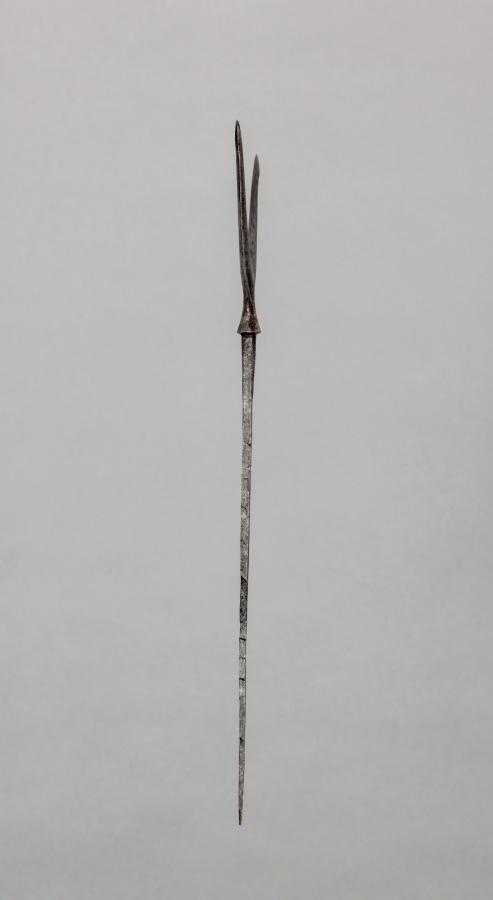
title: Arrow Point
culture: Japan, Edo period (1615–1868)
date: 1700s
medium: steel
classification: Arms and Armor